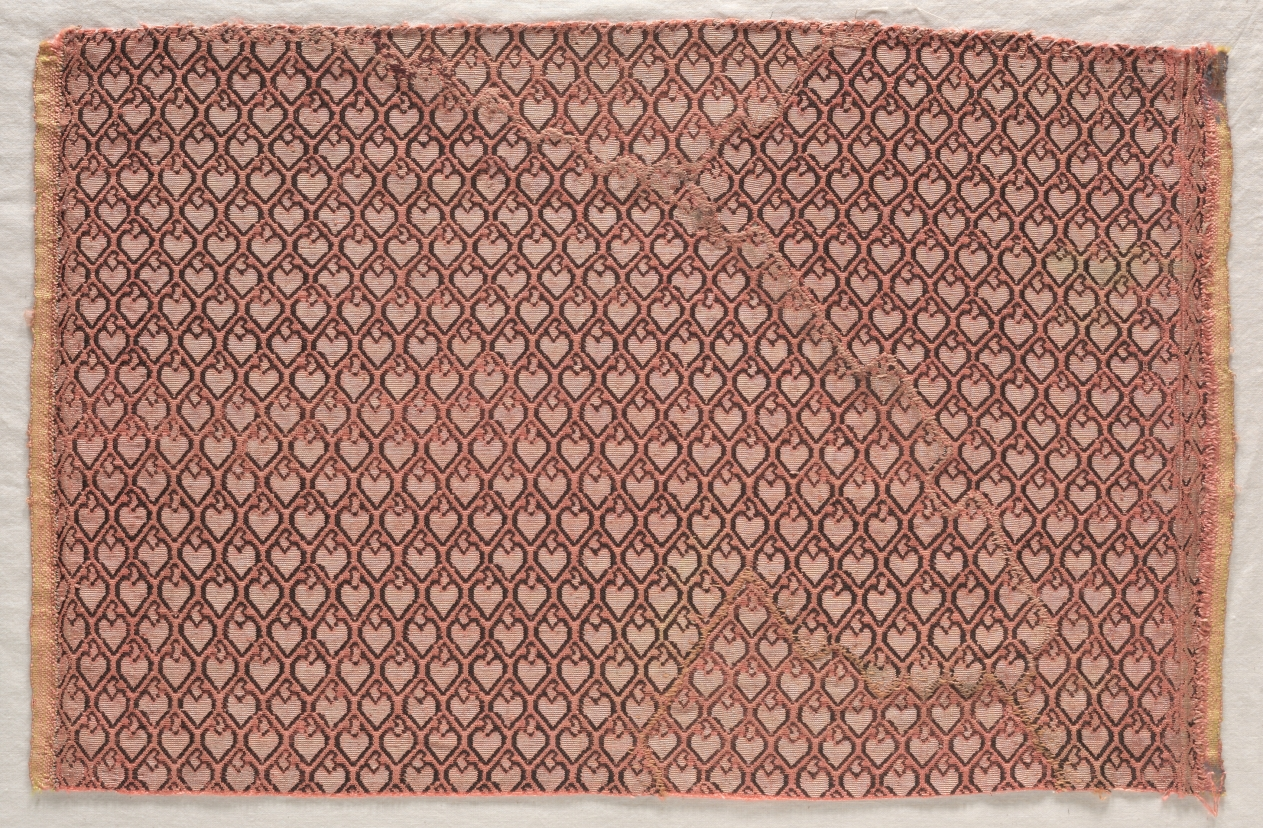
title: Brocade Textile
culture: France or Italy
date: early 1600s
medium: brocade; silk and metal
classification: Textile